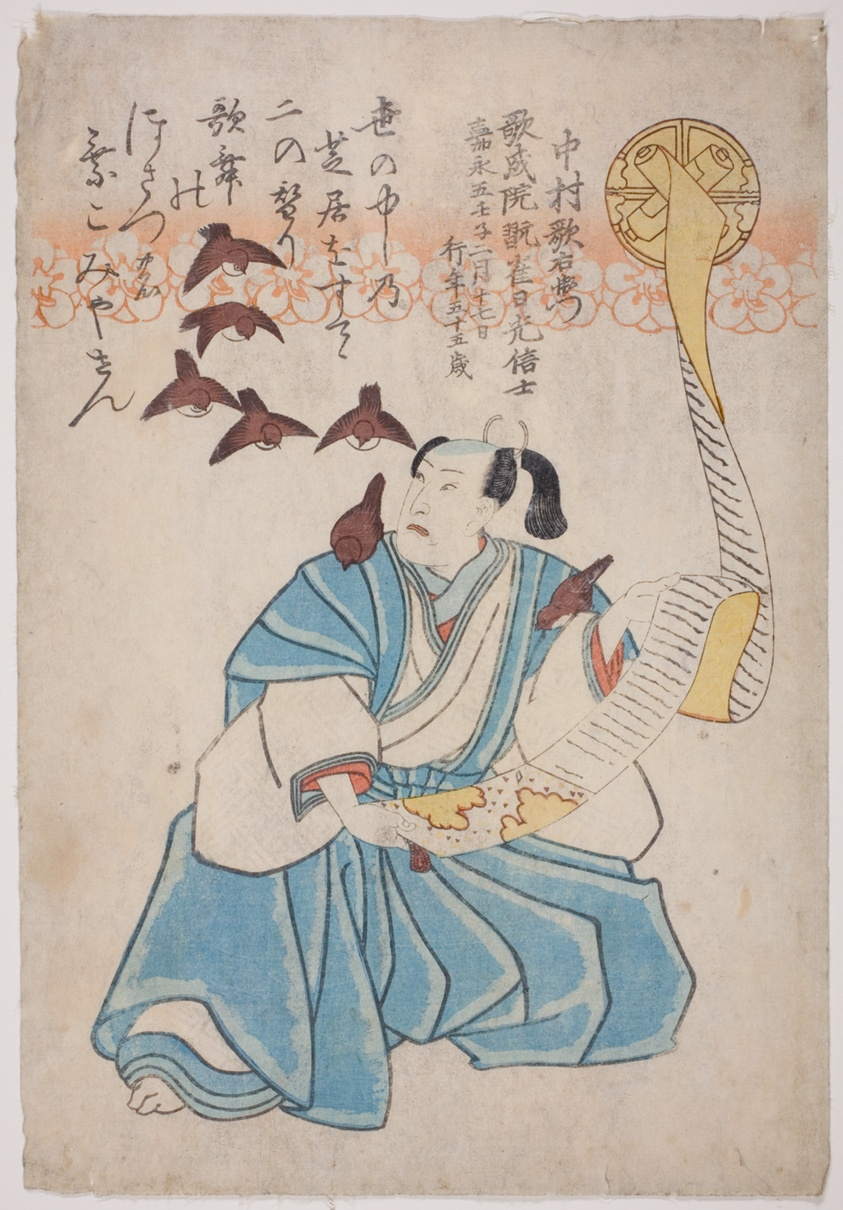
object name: Print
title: Memorial Portrait of the Actor Nakamura Utaemon IV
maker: Utagawa School (Japanese, 19th century)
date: 1852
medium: Color woodblock print; oban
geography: Japan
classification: print; asian art